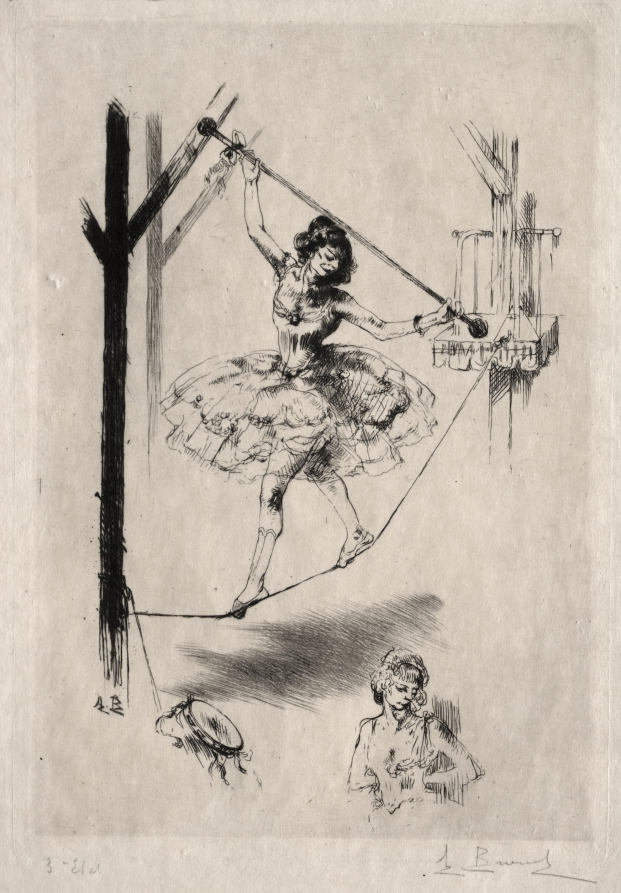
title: Tightrope Dancer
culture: France, 20th century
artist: Auguste Brouet (French, 1872–1941)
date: c. 1902–41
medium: etching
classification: Print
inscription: signed in pencil, lower right: A Brouet; in pencil, lower left: 3 etat